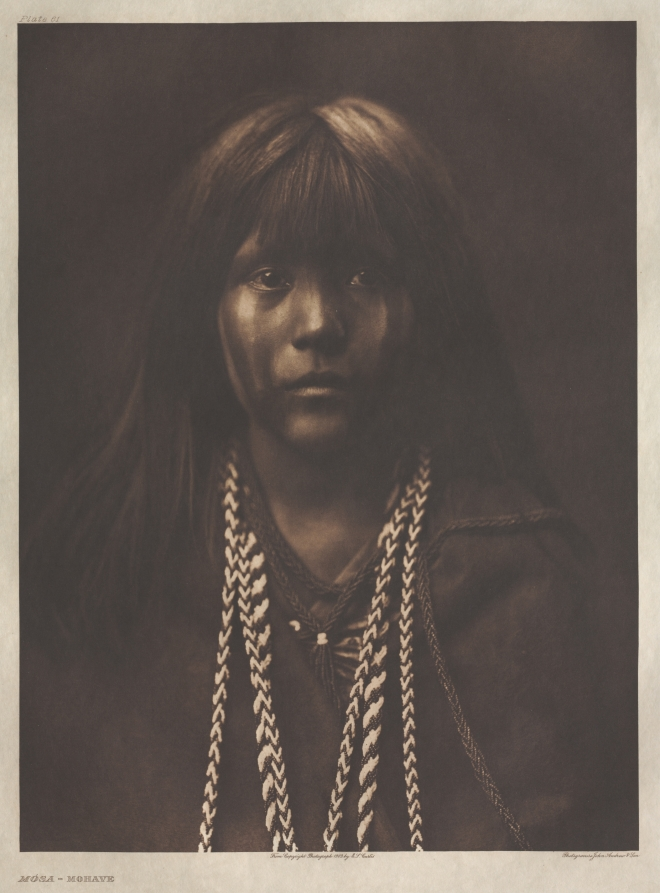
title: Portfolio II, Plate 61: Mósa-Mohave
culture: America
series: The North American Indian: being a series of Portfolios picturing and describing the Indians of the United States, the Dominion of Canada, and Alaska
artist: Edward S. Curtis (American, 1868–1952)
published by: The University Press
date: 1903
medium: photogravure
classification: Portfolio